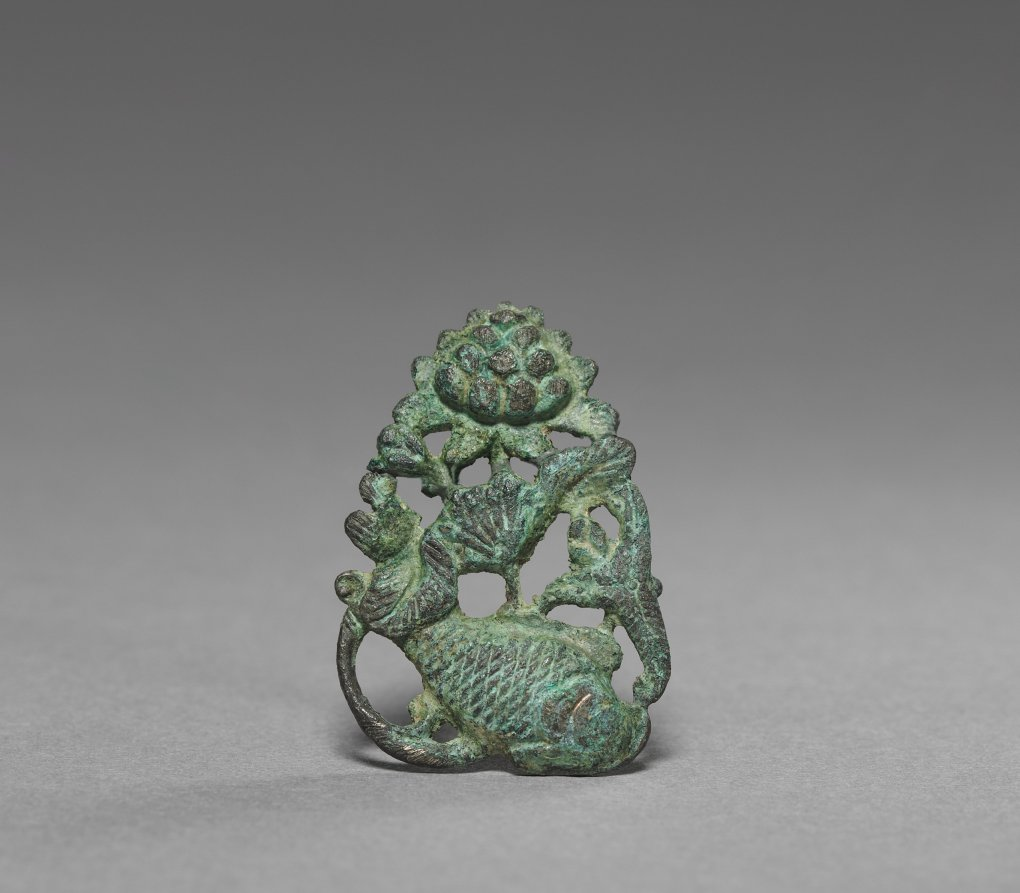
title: Ornament with Carp and Lotus Design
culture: Korea, Goryeo dynasty (918–1392)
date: 1100s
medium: bronze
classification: Metalwork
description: Metalworking techniques advanced remarkably during the Goryeo period (918–1392). Sophisticated metal objects with intricate designs were used not only as daily accessories, but also as burial goods for commemorating the dead. Traces of fibers found on the backs of these metal ornaments suggest that they were once used as brooches to hold garments together.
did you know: This metal ornament is part of a decorative brooch once used to hold clothes together.